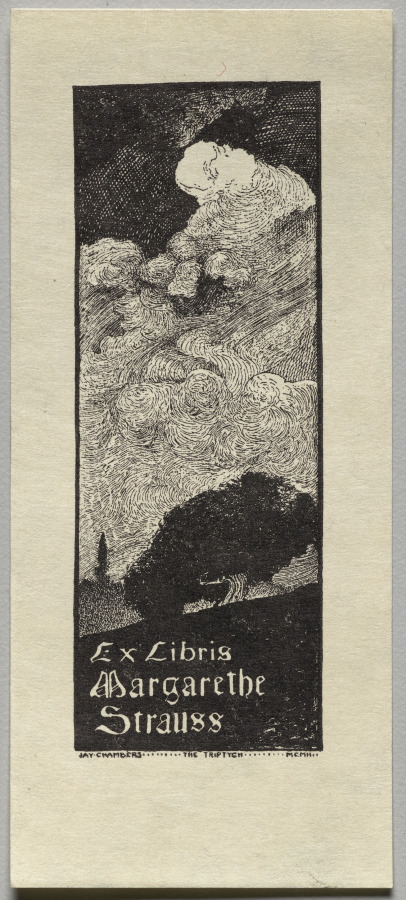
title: Bookplate: Margarethe Strauss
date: 1902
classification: Print